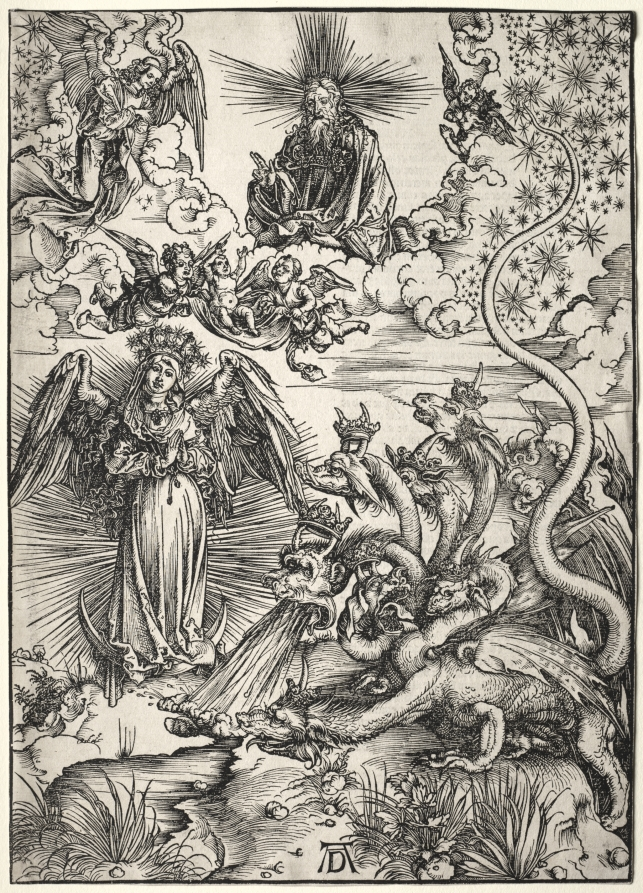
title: Revelation of St. John: The Woman Clothed with the Sun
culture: Germany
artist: Albrecht Dürer (German, 1471–1528)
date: 1511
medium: woodcut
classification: Print